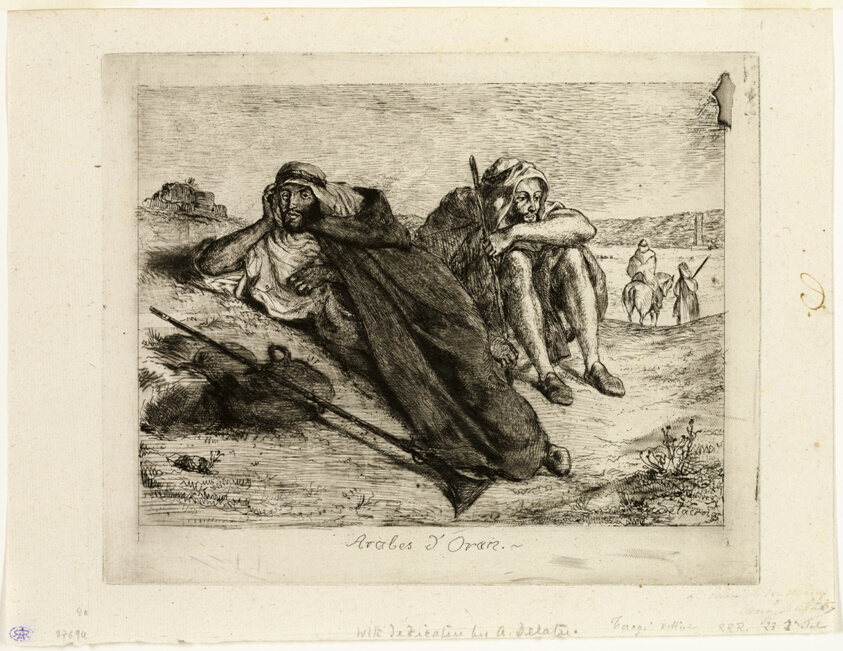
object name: Print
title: Arabs of Oran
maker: Eugène Delacroix (French, 1798-1863)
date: 1833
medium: Etching, roulette and drypoint on ivory laid paper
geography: France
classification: etching; print; prints and drawing